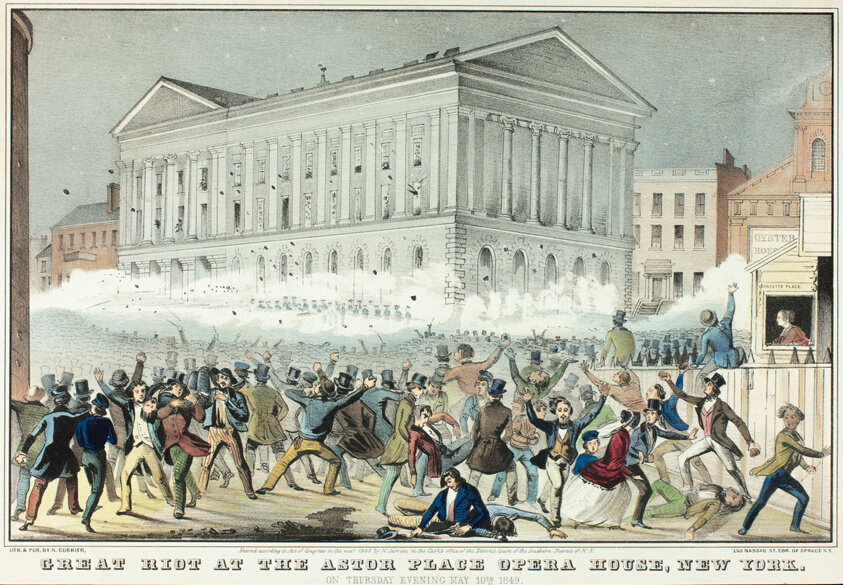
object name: Print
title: Great Riot at the Astor Place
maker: Nathaniel Currier (American, 1813-1888)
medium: Hand-colored lithograph on paper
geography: United States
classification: lithograph; print; prints and drawing